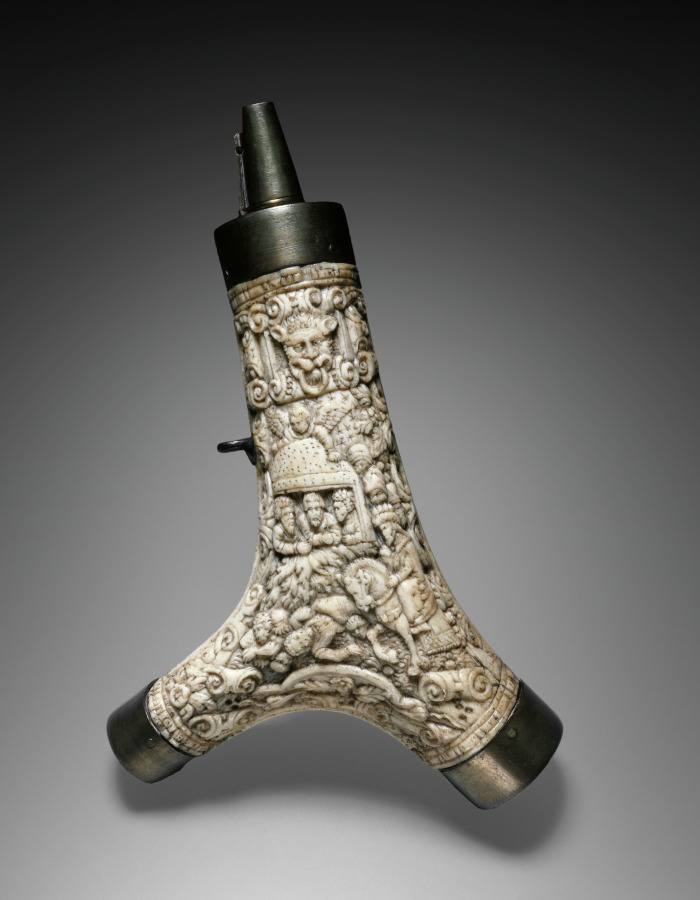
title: Powder Flask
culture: France, late 16th-early 17th century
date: late 1500s-early 1600s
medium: staghorn (two branches) with carved relief decoration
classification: Arms and Armor